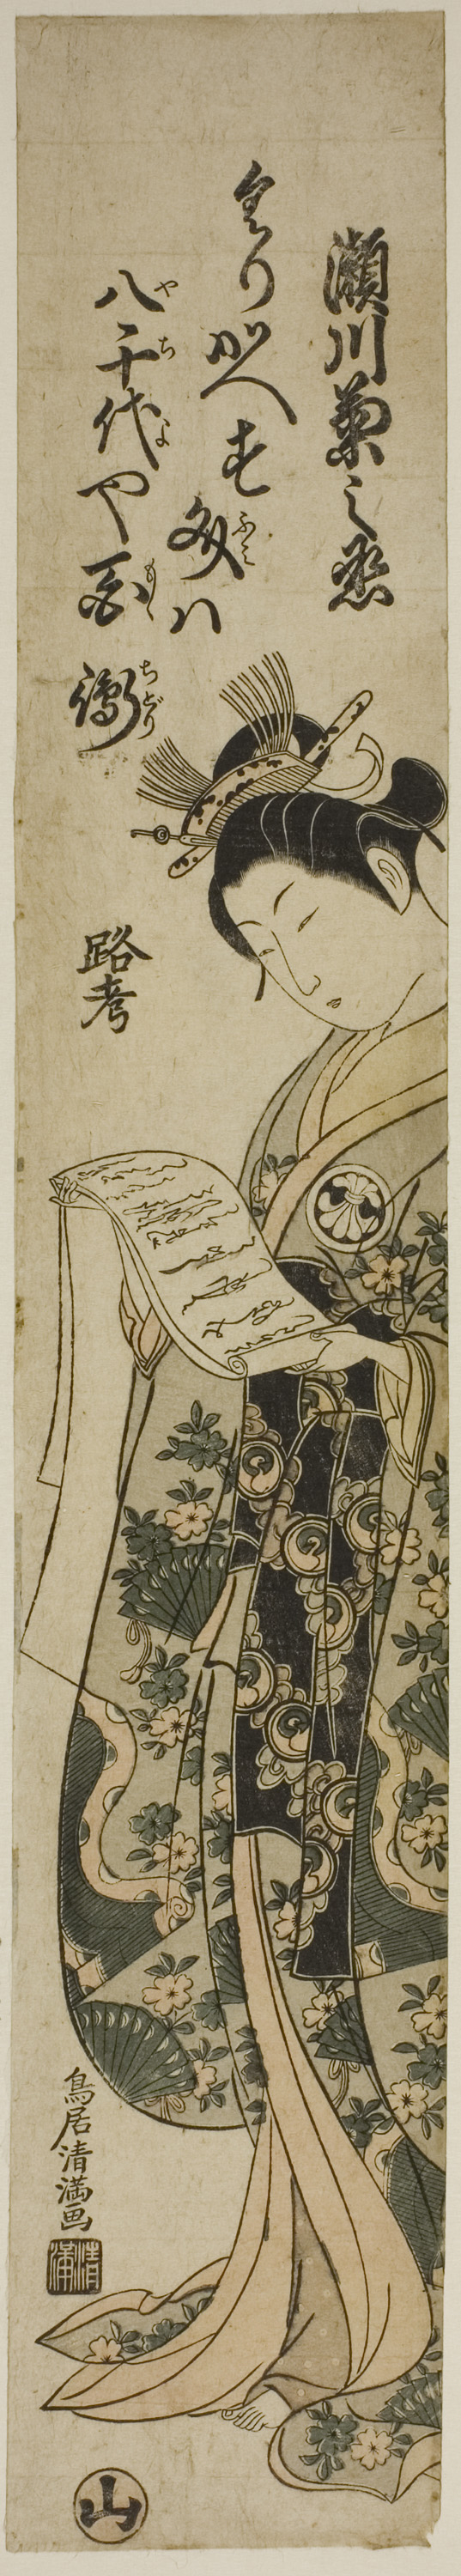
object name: Print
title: The Actor Segawa Kikunojo II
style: Japanese (culture or style)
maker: Torii Kiyomitsu I (Japanese, 1735–1785)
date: c. 1761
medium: Color woodblock print; hashira-e, benizuri-e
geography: Japan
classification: woodblock print; print; asian art